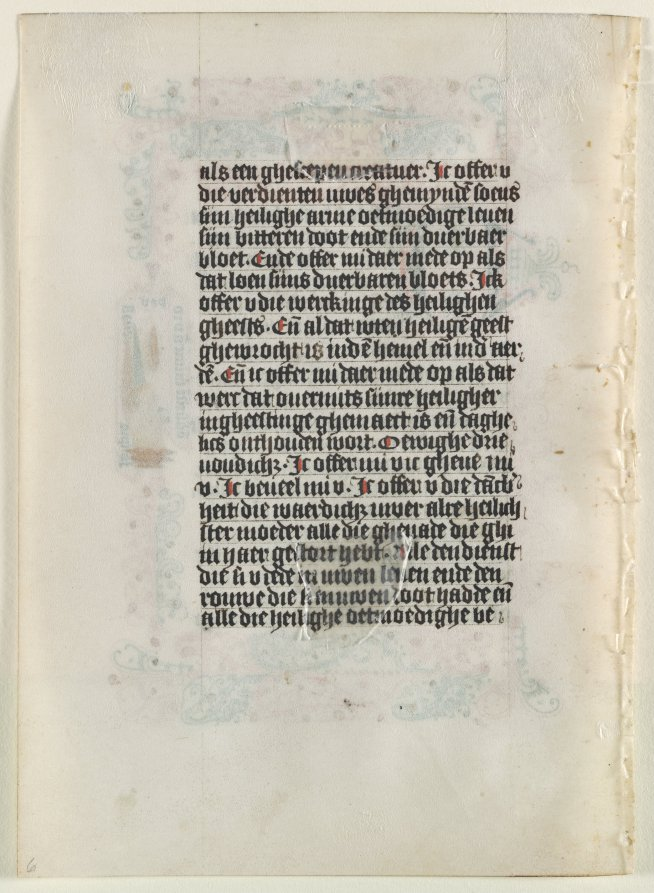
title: Leaf Excised from a Book of Hours: Angel with a Banderole within a Flourished Border (Prayer to the Holy Trinity)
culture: North Netherlands, Delft, 15th century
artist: possibly by Workshop of the Convent of St. Agnes (Netherlandish)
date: c. 1475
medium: ink, tempera, and gold on vellum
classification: Manuscript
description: This leaf provides an excellent example of the high point of the penmanship for which Delft manuscripts were famous. The red and blue penwork flourishes filling the margins of the page belong to what Dutch scholars call the "block group," in which the borders are made up of a number of formal geometric compartments, each tightly filled in with contrasting penwork. This form of decoration appears to be unique to books of hours and breviaries produced in Delft, and therefore points unambiguously to that city as its place of production. An additional feature of this group of manuscripts is the use of emblematic borders in the form of figures with banderoles. These generally relate in some didactic way to the subjects of the texts or main miniatures. Many Delft devotional manuscripts were associated with religious houses that decorated books for the secular market. These included the Augustinian convent of Saint Agnes and the Brothers of the Common Life at Saint Hieronymusdal. Saint Agnes herself was listed in the calendar of the original manuscript for January 21. The text follows Geert Groote’s (died 1384) translation of the book of hours into Dutch. The Netherlands was the only region within Europe in which the vernacular replaced Latin in the book of hours.